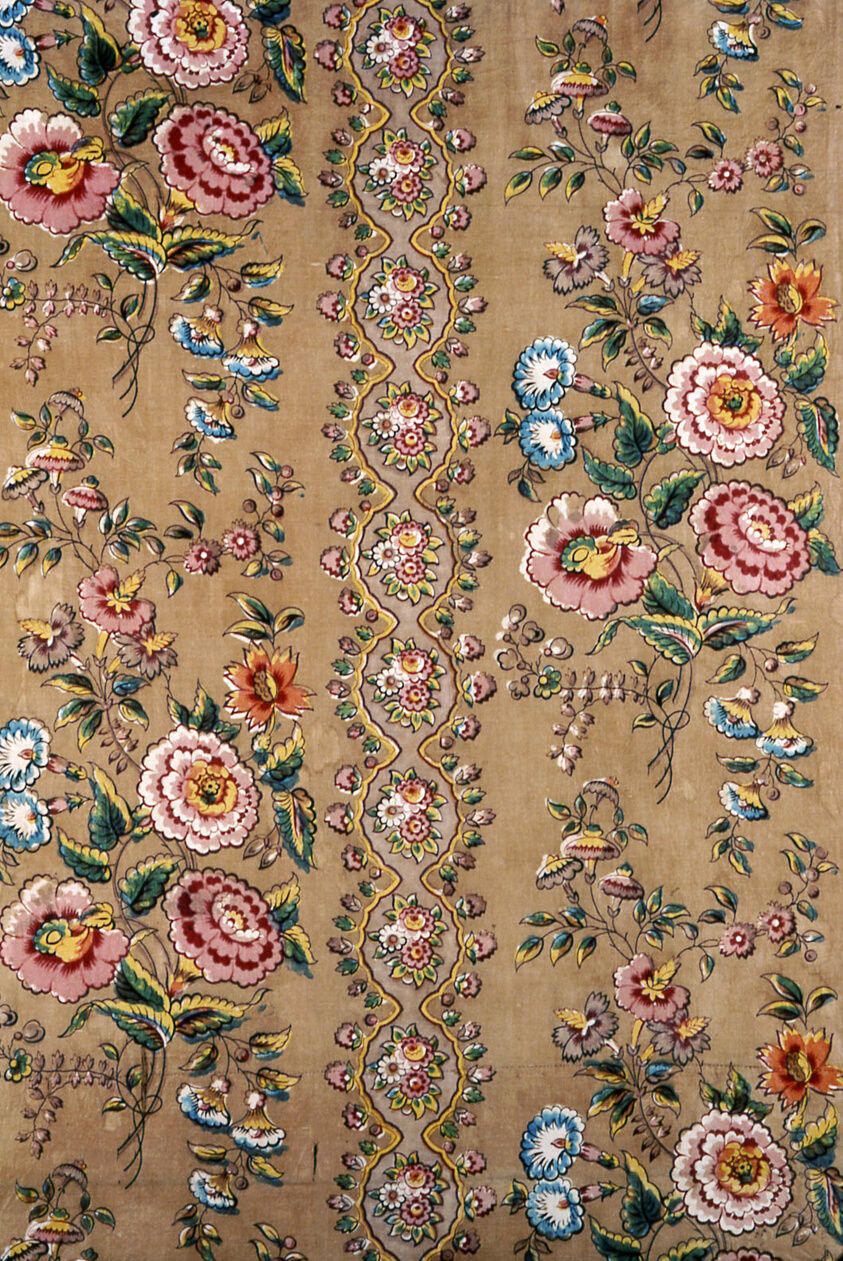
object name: Textile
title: Fragment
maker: England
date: c. 1815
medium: Cotton, plain weave; roller printed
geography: England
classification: textile; weaving - printed